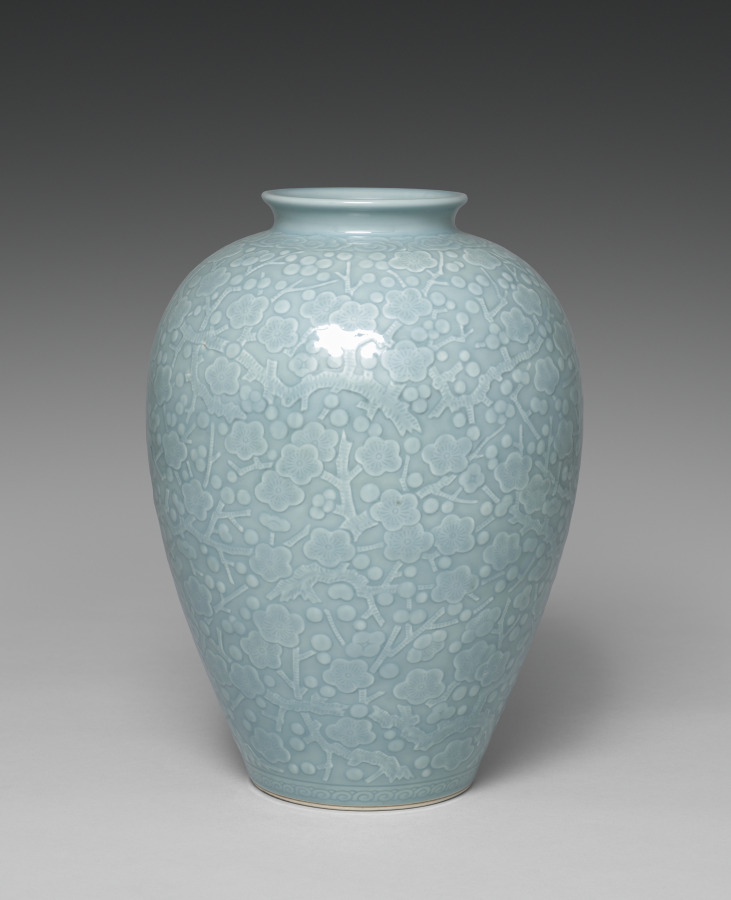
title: Vase with Plum Blossoms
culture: Japan, Taishō period (1912–26) or Shōwa period (1926–89)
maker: Seifū Yohei IV (Japanese, 1872–1951)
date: 1914–46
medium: Glazed porcelain with molded and carved design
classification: Ceramic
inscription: 清風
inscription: "James & Christine Heusinger/ Japanese Art Collection"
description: Although inspired by representations of flowering plum, or prunus, in Chinese ceramics, the dense allover design of branches on this vase also resembles Japanese textile patterns. As they might on a kimono, the trunks run in alternate directions up and down the surface. At the foot, or bottom of the vase, is a classic band of spirals, and at the neck, or narrowed portion near the opening, is a collar of clouds.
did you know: Yohei IV’s allover design of budding and flowering plum blossoms, strongly associated with spring and with China, is combined with his father’s “water color” glaze on this vase.